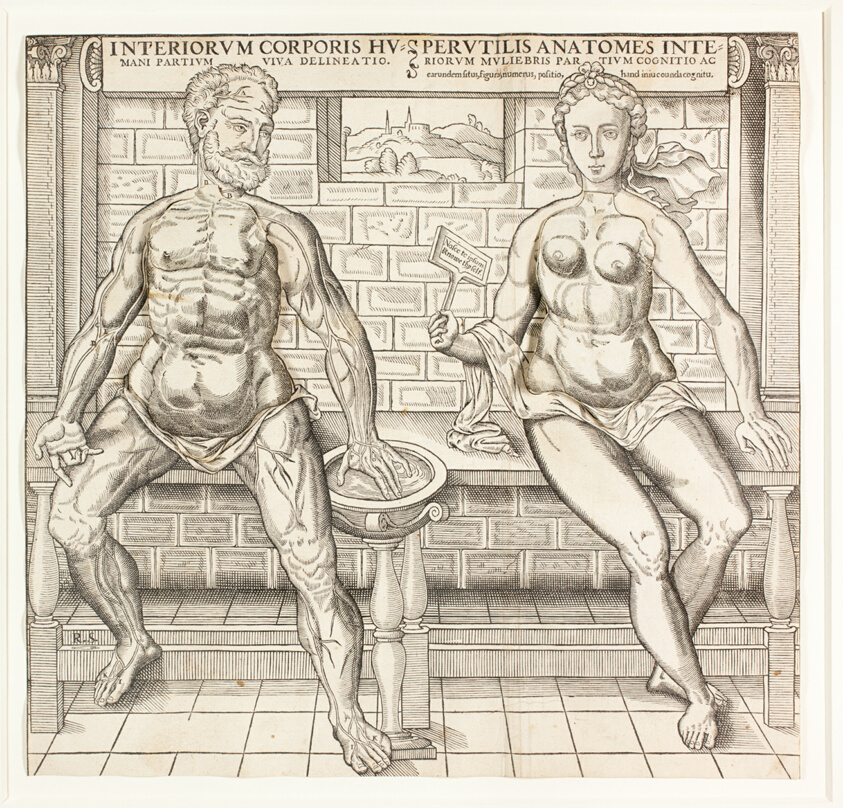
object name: Print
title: Interiorum corporis humani partium viva delineatio, from the second edition of the Compendiosa totius anatomie delineation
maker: Monogrammist R. S. (active in London or Paris, 1550/65)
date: 1555/59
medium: Woodcut in black on ivory laid paper, with cut and tipped ivory laid papers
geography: England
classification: woodcut; print; prints and drawing